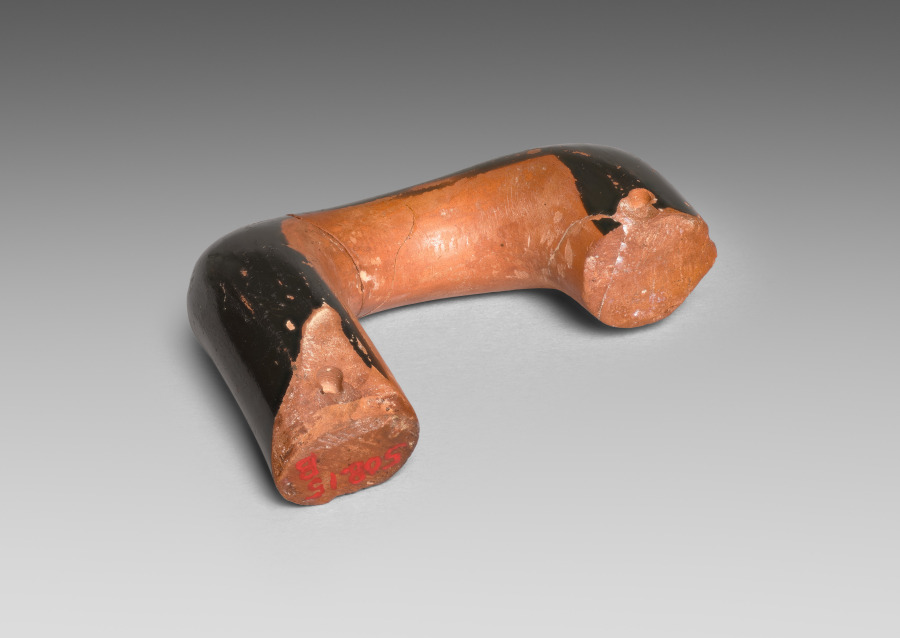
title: Handle from Red-Figure Kylix (Drinking Cup)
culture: Greece, Athens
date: c. 480 BCE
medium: ceramic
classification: Ceramic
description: Although very similar to the ancient handle tip that it was used to replace, the drill holes in this fragment suggest that it was attached in modern times (before 1915). It was removed during an extensive conservation treatment in 1990.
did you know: Originally from a different kylix, this handle tip was used in a modern repair.